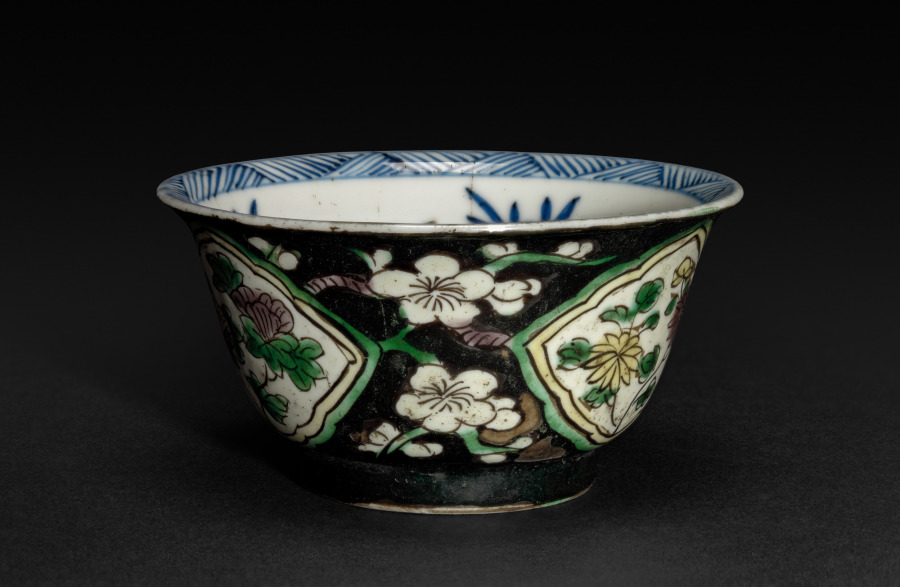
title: Cup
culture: China, Qing dynasty (1644-1911), Kangxi reign (1662-1722)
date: 1662–1722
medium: porcelain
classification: Ceramic